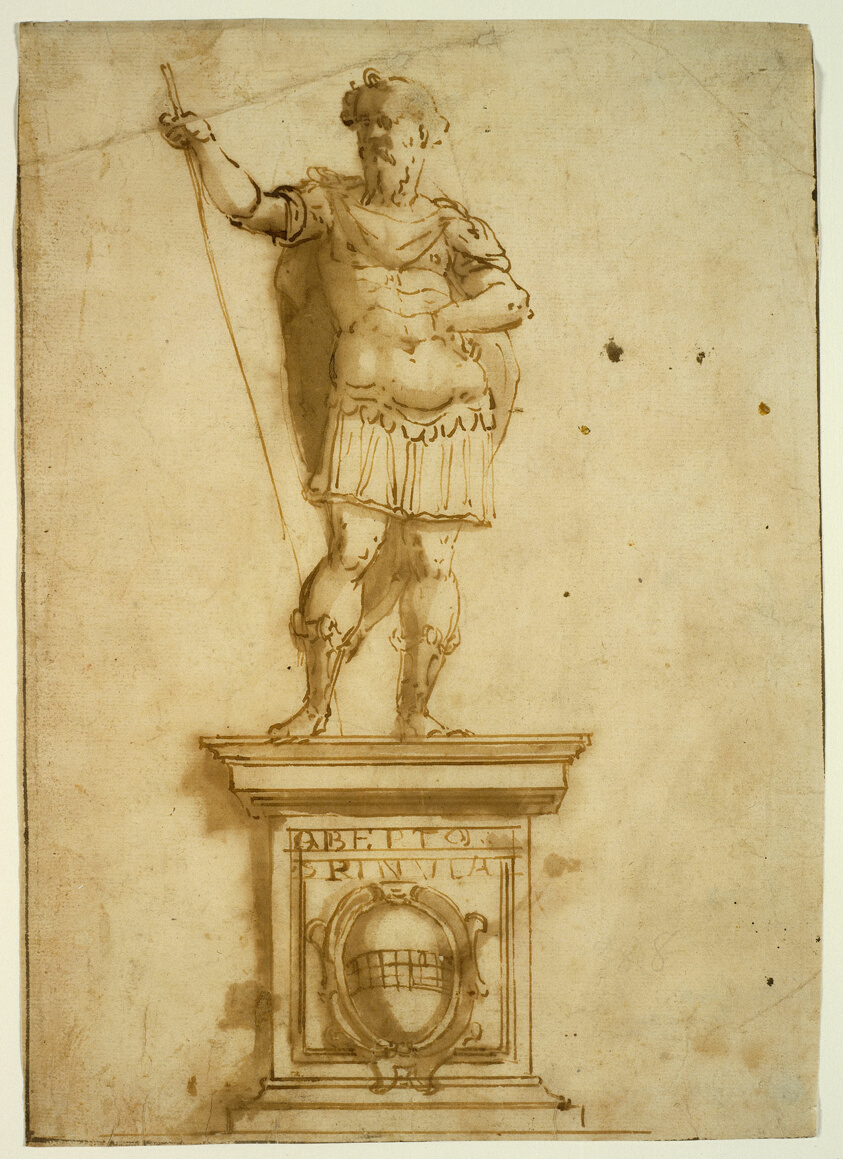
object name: Drawing and Watercolor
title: Statue of Standing Warrior on a Pedestal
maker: Attributed to Giovanni Battista Castello, called Il Bergamasco; Italian, c. 1509-1569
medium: Pen and iron gall ink with brush and brown wash, on buff laid paper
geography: Italy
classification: pen and ink drawings; drawings (visual works); prints and drawing